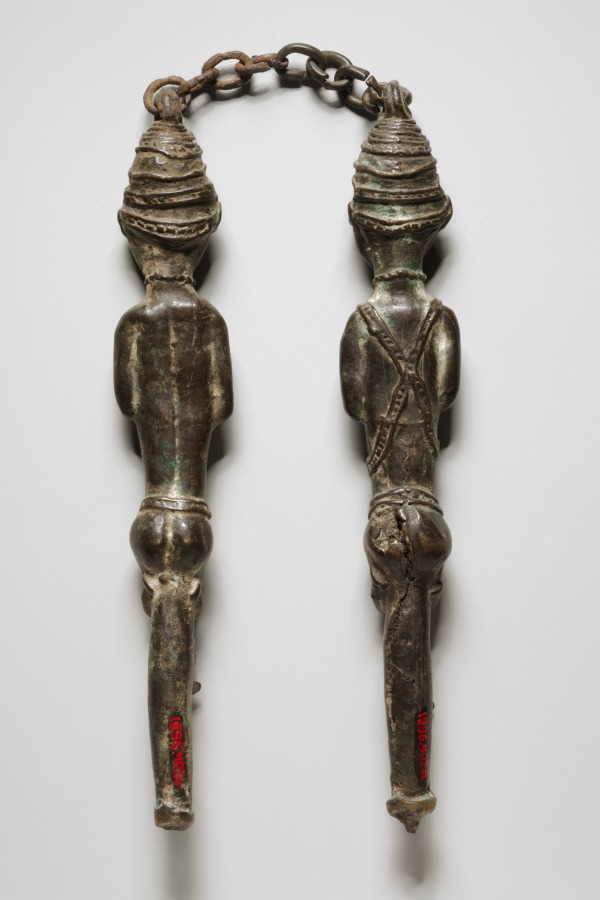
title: Pair of Ritual Staffs (ẹdan Ògbóni)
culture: Africa, West Africa, Nigeria, Yorùbá-style maker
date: 1800s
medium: Copper alloy and iron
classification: Sculpture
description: The chain connecting these two figures allows them to be worn in public by a member of the Ògbóni or Òṣùgbó association as authority emblems. The male on the right gives the association’s typical salute by clasping his left fist on the right one, while the female on the left holds her breasts as a sign of welcome and generosity. The use of copper alloy and iron expresses Ògbóni/Òṣùgbó's concerns with longevity and durability. Long iron spikes would have originally protruded from each figure's base.